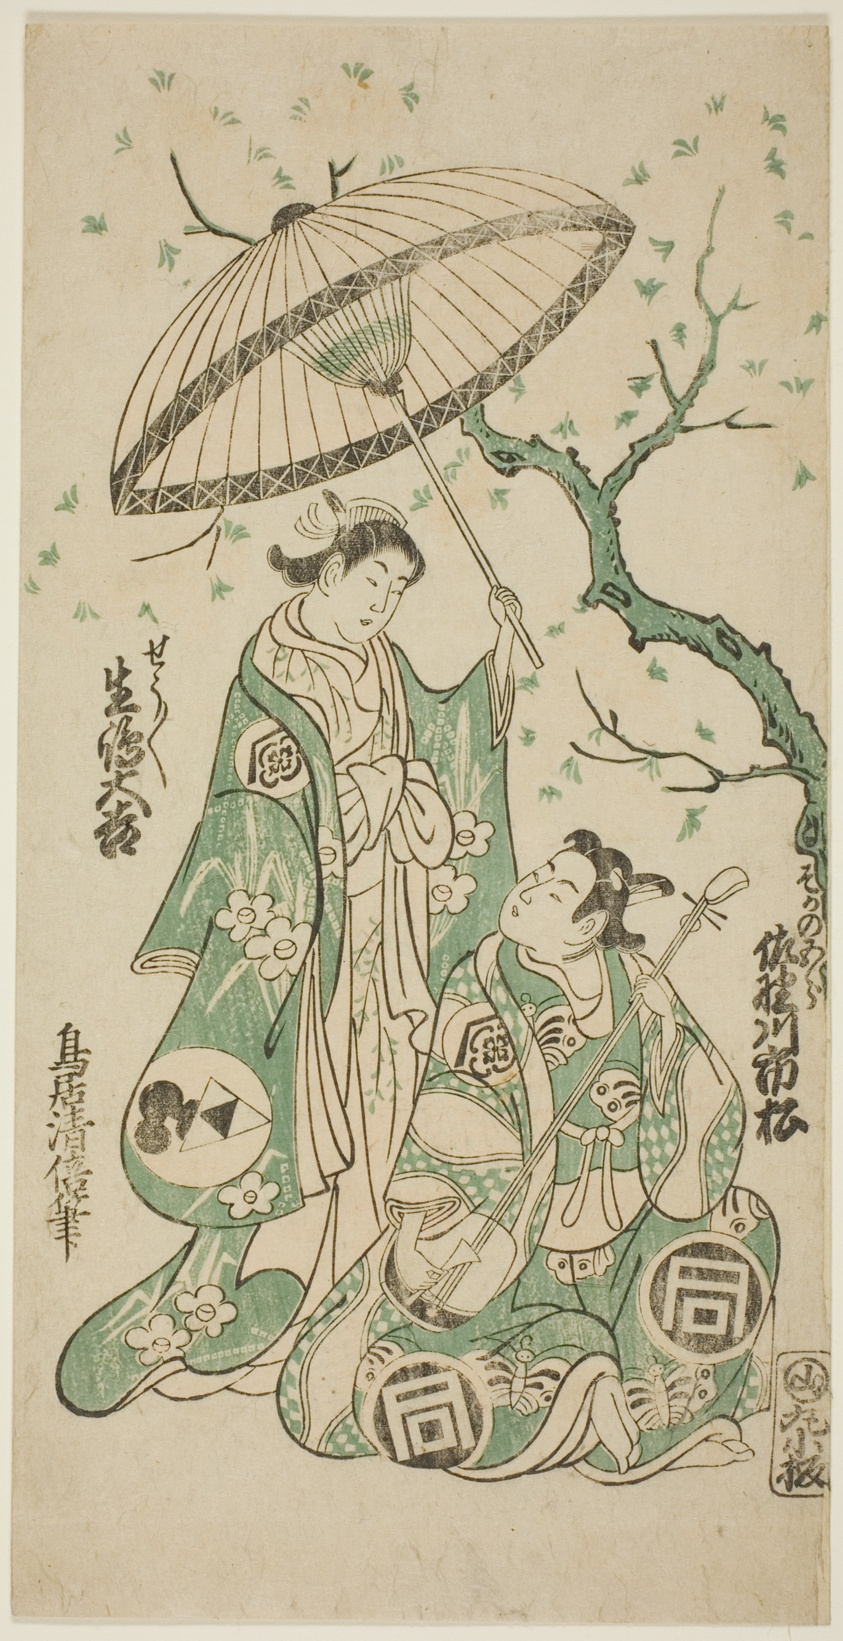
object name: Print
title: The Actors Sanogawa Ichimatsu I as Soga no Goro and Ikushima Daikichi II as Kewaizaka no Shosho in the play "Monzukushi Nagoya Soga," performed at the Ichimura Theater in the first month, 1748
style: Japanese (culture or style)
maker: Torii Kiyomasu II (Japanese, 1706 (?)–1763 (?))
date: 1748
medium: Color woodblock print; hosoban, benizuri-e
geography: Japan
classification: woodblock print; print; asian art